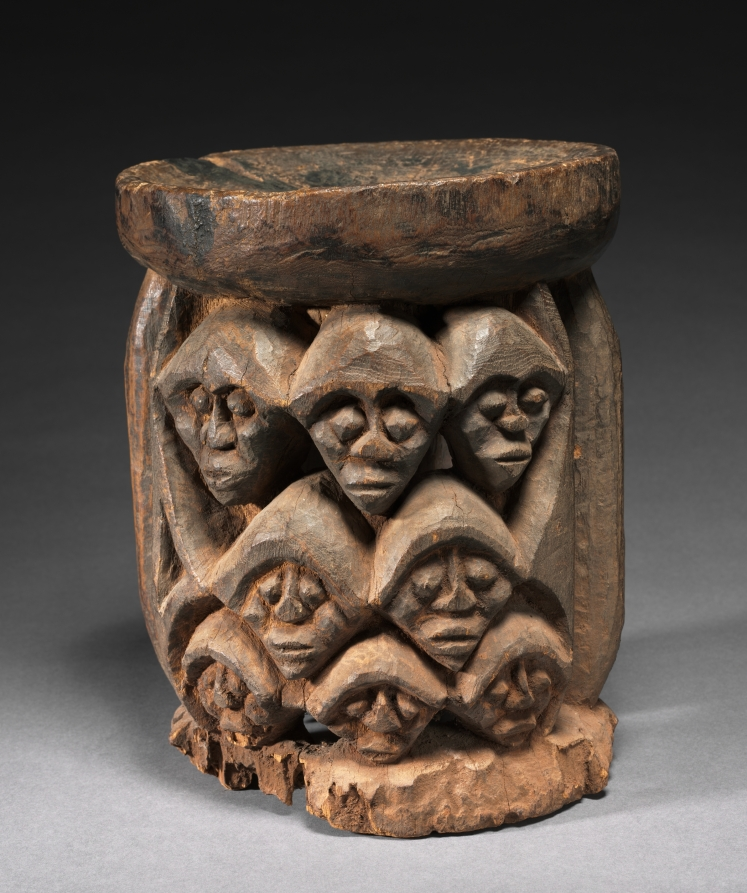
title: Stool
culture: Africa, Central Africa, Cameroon, unknown maker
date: c. 1910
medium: Wood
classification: Furniture and woodwork